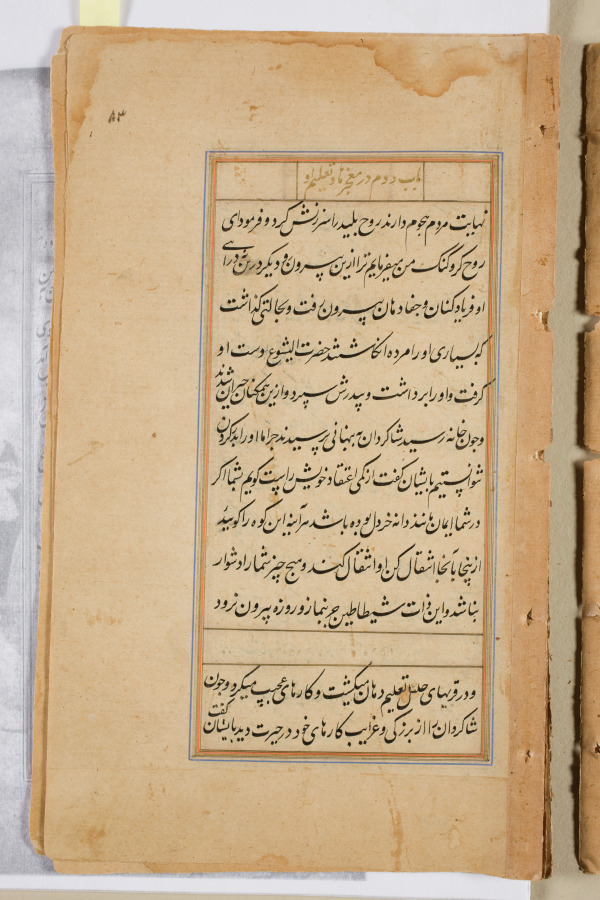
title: Text page from a Mirror of Holiness (Mir’at al-quds) of Father Jerome Xavier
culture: Mughal India, Allahabad, made for Prince Salim (1569–1627)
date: 1602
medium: Ink and gold on paper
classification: Manuscript